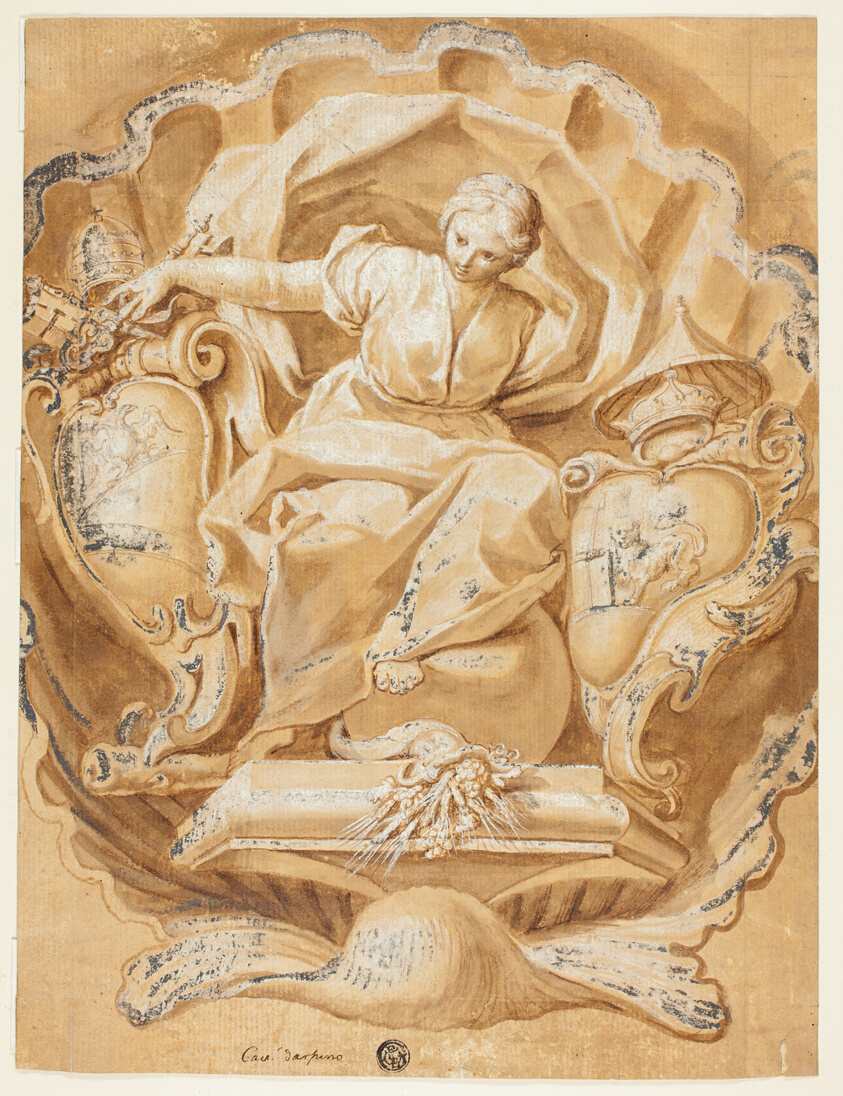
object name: Drawing and Watercolor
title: Allegorical Figure with Arms of Alexander VIII (Ottoboni) and Arms of Papacy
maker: Attributed to Francesco Mancini (Italian, 1679-1758); or Domenico Piola (Itaian, 1627-1703); or Giueppe Cesari (Italiian, 1568-1640); or after Marco Antonio Franceschini (Italian, 1648-1729)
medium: Pen and brown ink and brush and brown wash, heightened with lead white (partly discolored), on ivory laid paper, laid down on ivory laid paper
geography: Italy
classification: ink or chalk wash; drawings (visual works); prints and drawing